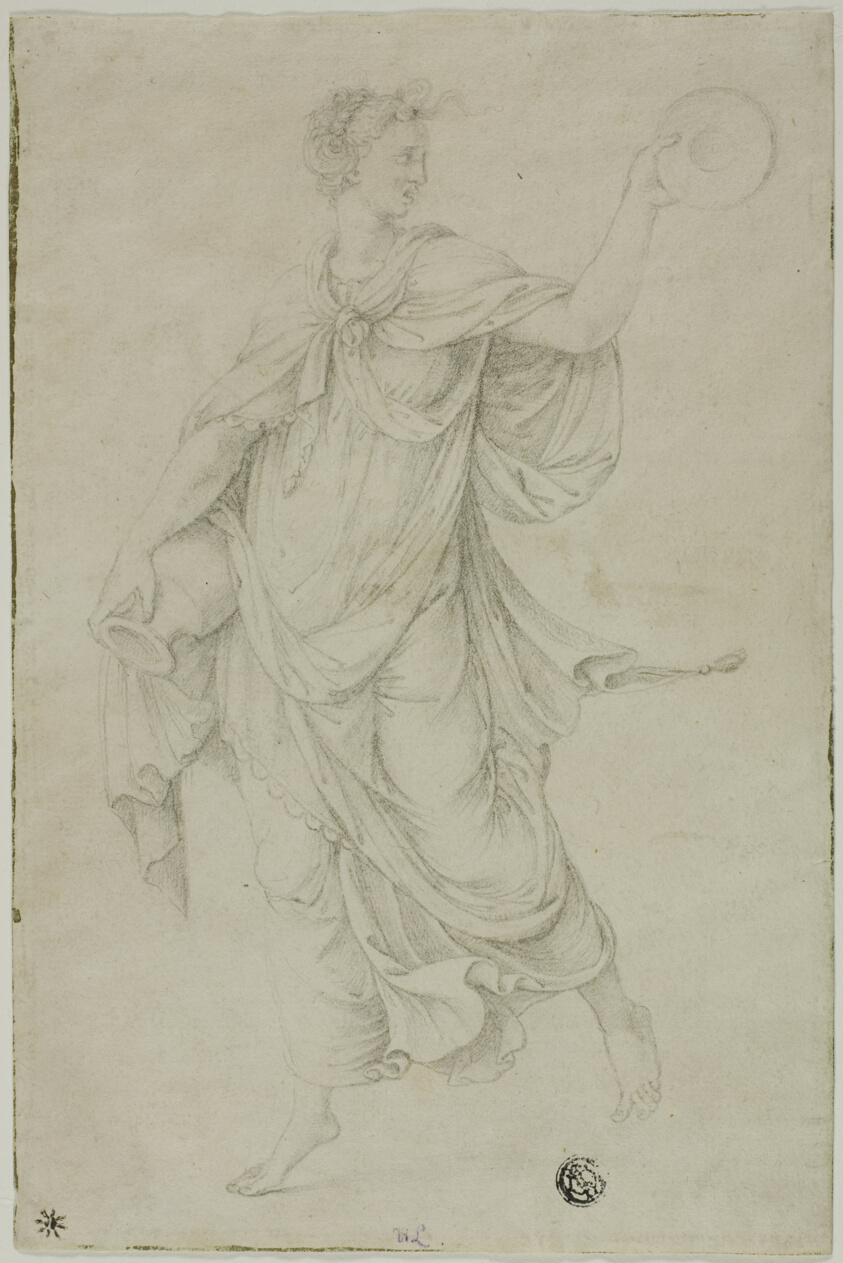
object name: Drawing and Watercolor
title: Temperance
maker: Attributed to Girolamo Sellari, called Girolamo da Carpi; Italian, 1501-1556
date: 1521/56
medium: Black chalk on ivory laid paper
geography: Italy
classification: chalk; drawings (visual works); prints and drawing